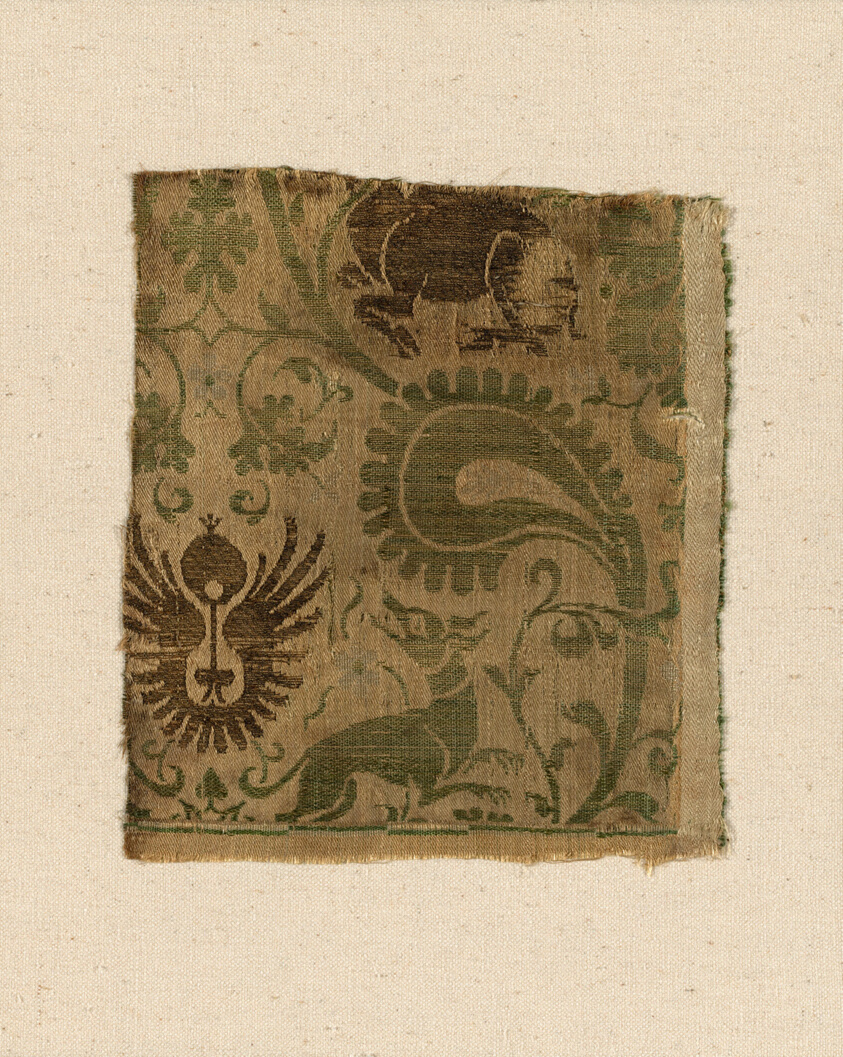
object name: Textile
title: Fragment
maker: Italy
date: 14th century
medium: Silk and gilt-animal-substrate-wrapped linen, warp-float faced twill weave with supplementary patterning and brocading wefts bound by secondary binding warps in plain interlacing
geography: Italy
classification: textile; weaving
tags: dogs, animals